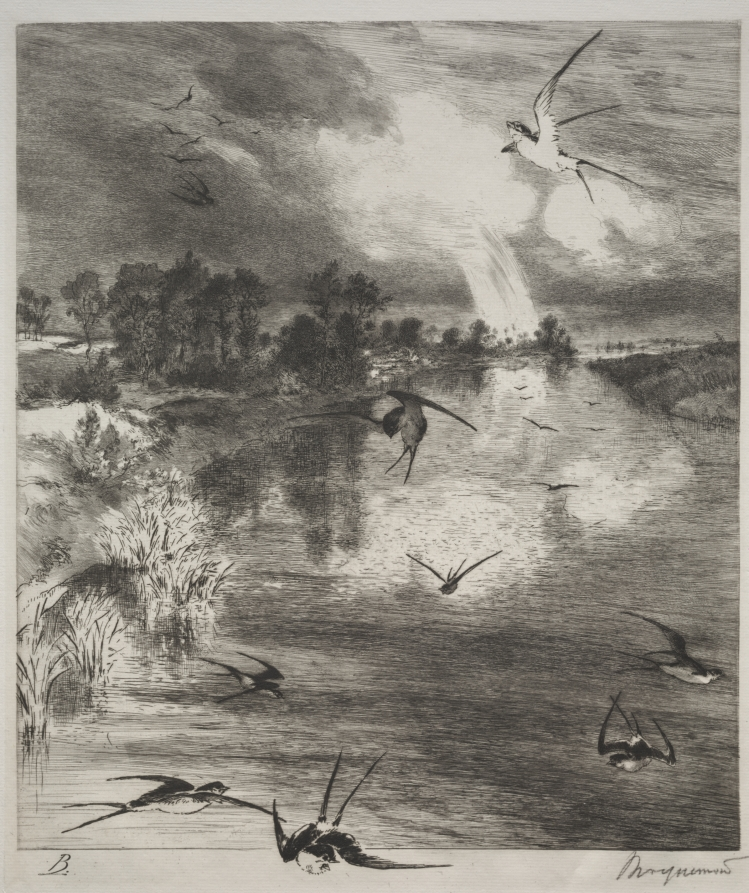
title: Swallows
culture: France, 19th century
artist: Félix Bracquemond (French, 1833–1914)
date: 1882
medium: etching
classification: Print